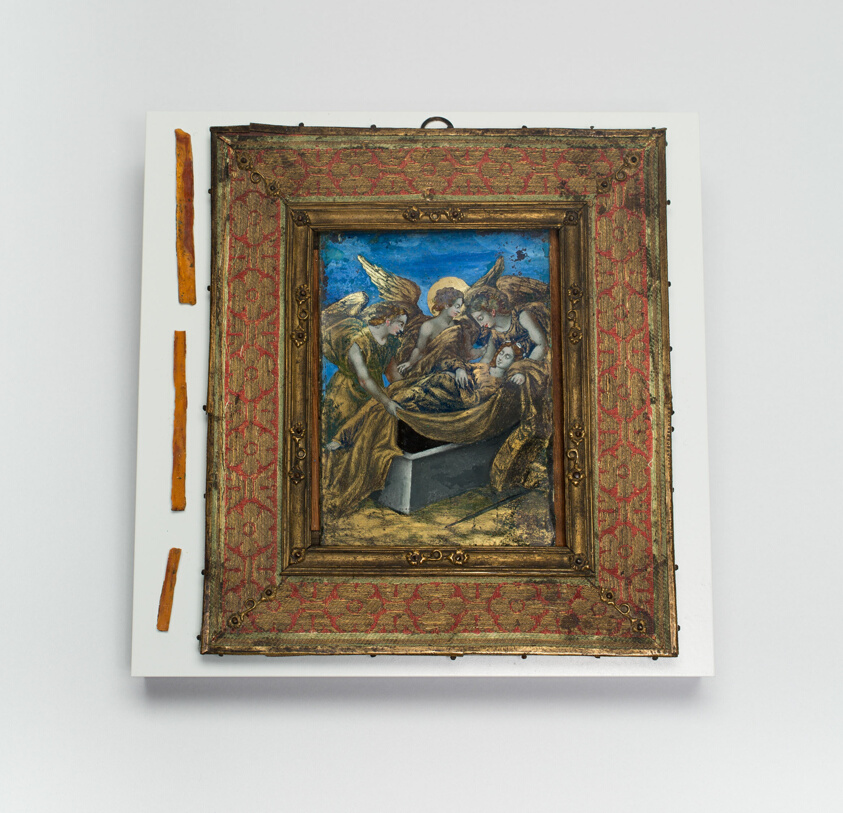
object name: Decorative Arts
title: Entombment of Saint Catherine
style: 16th Century, 17th Century, sixteenth century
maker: Italian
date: 16th–17th century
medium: Glass, painted and gilded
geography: Italy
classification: reverse glass painting; glass; european painting; paint; painting; european decorative arts; decorative arts; Italian; religious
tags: Saint Catherine, Burial, religious scenes, religious figures, religious, religion, Christian subjects, Christianity, saints, angels, woman